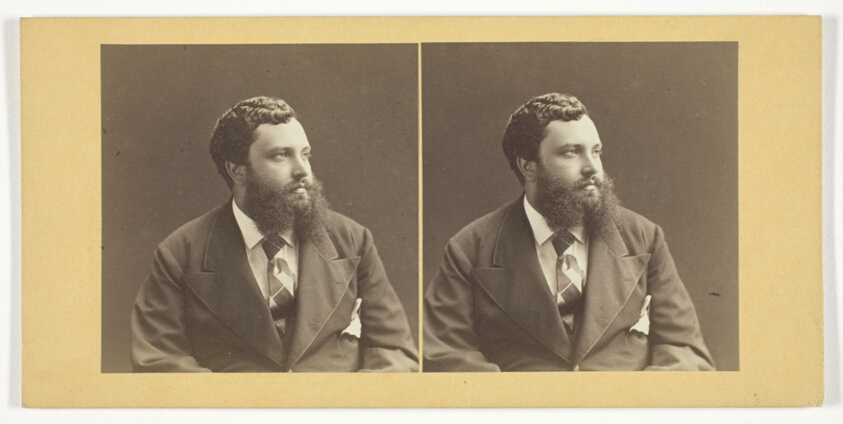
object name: Photograph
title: Untitled (Portrait of a Man)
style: 19th century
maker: K.K. Hof (Austrian, active mid 19th century)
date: Mid 19th century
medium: Albumen print, stereo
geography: Vienna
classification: photography; photograph; albumen silver print; stereograph (albumen)